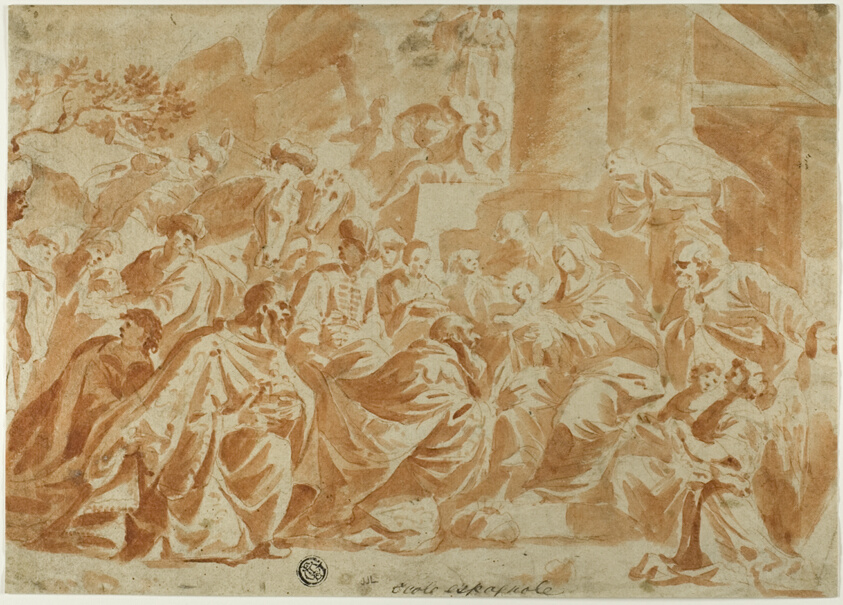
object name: Drawing and Watercolor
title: Adoration of the Magi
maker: Possibly school of Peter Paul Rubens; Flemish, 1577-1640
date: 17th century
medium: Red chalk and brush and red chalk wash, over traces of black chalk, on ivory laid paper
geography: Flanders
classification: chalk; drawings (visual works); prints and drawing